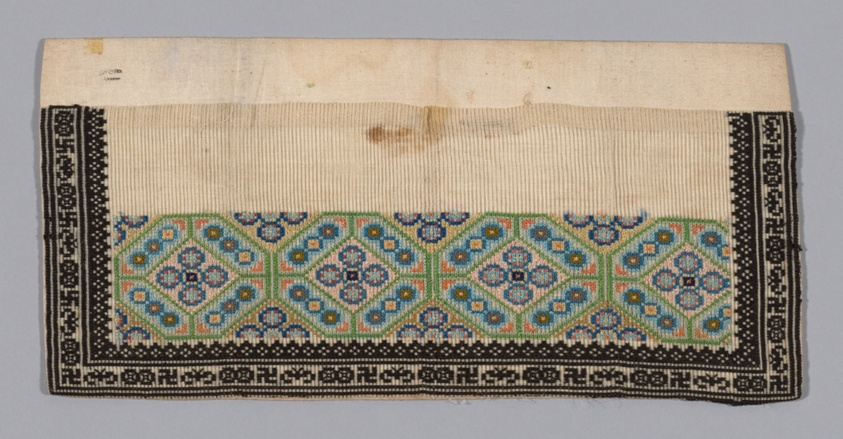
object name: Costume and Accessories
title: Trouser Band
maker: Han-Chinese (China)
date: Qing dynasty (1644–1911), 1875/1900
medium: Forty-four pairs and eight odd pieces of embroidered sleeve, ankle bands, etc. on gauze.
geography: China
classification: costume - embroidery; embroidery; costume